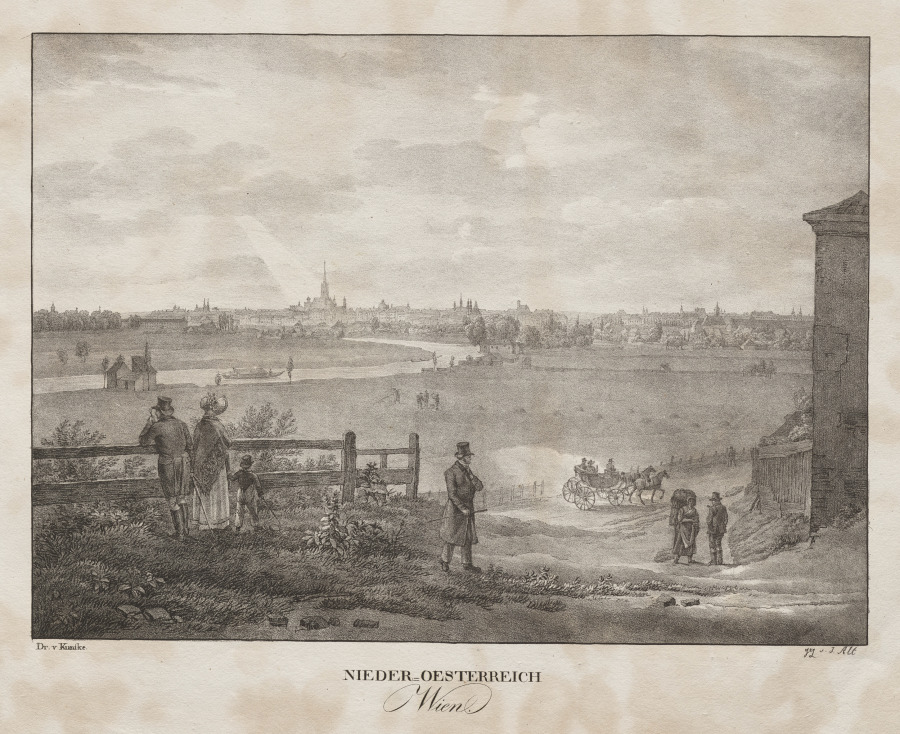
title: Nieder-oesterreich, Stadt Wien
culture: Austria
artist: Jakob Alt (Austrian, 1789–1872)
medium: lithograph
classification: Print